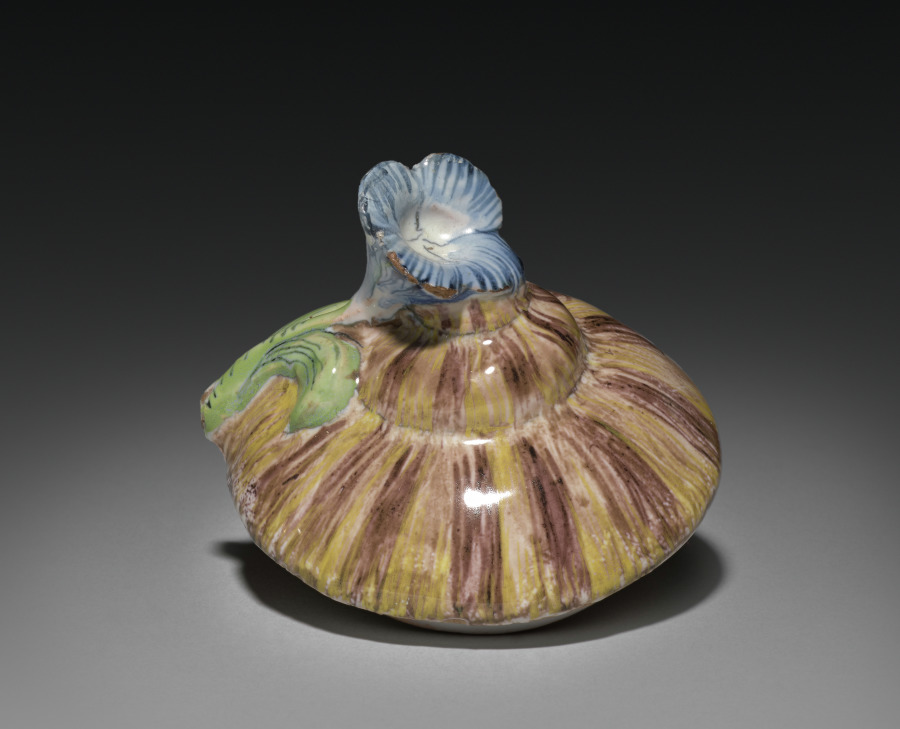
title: Cover for a Box in the Form of a Snail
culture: France, 18th century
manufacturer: Strasbourg Factory (France)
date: c. 1750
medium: faience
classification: Ceramic